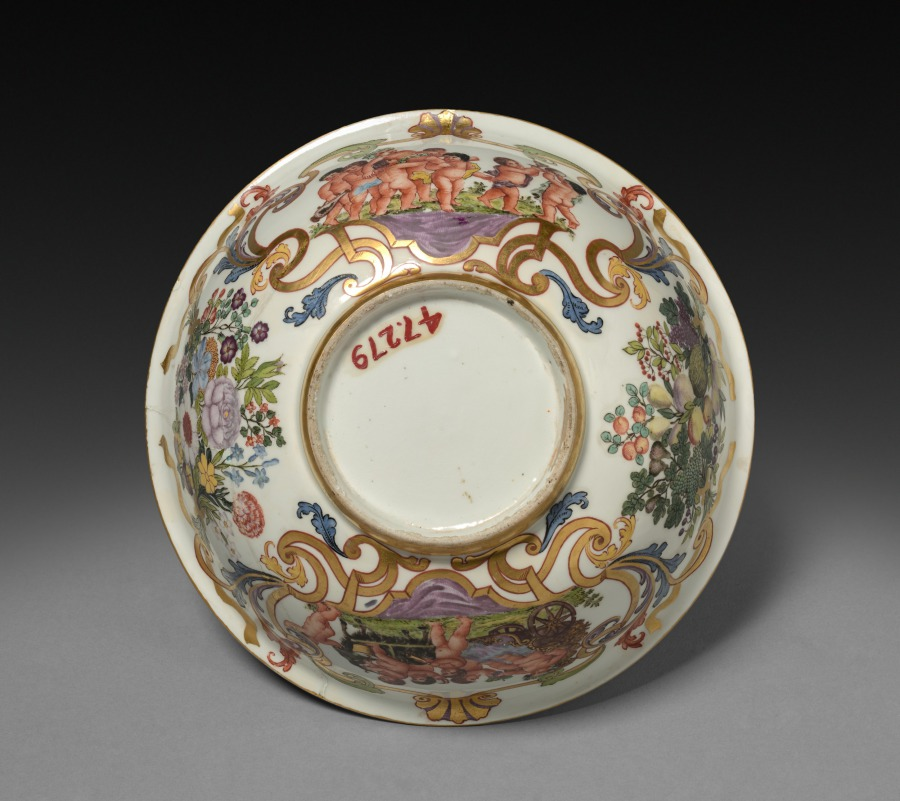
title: Bowl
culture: Austria (?), Vienna (?), 18th century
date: c. 1730–1740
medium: porcelain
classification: Ceramic